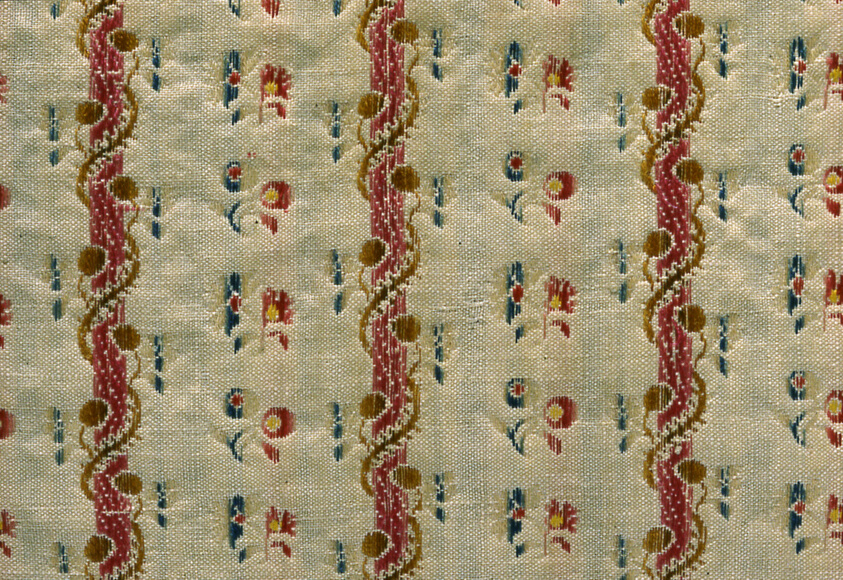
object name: Textile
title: Panel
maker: England or France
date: 18th century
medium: Wool, plain weave with supplementary patterning warps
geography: England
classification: textile; weaving; furnishing textile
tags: flowers